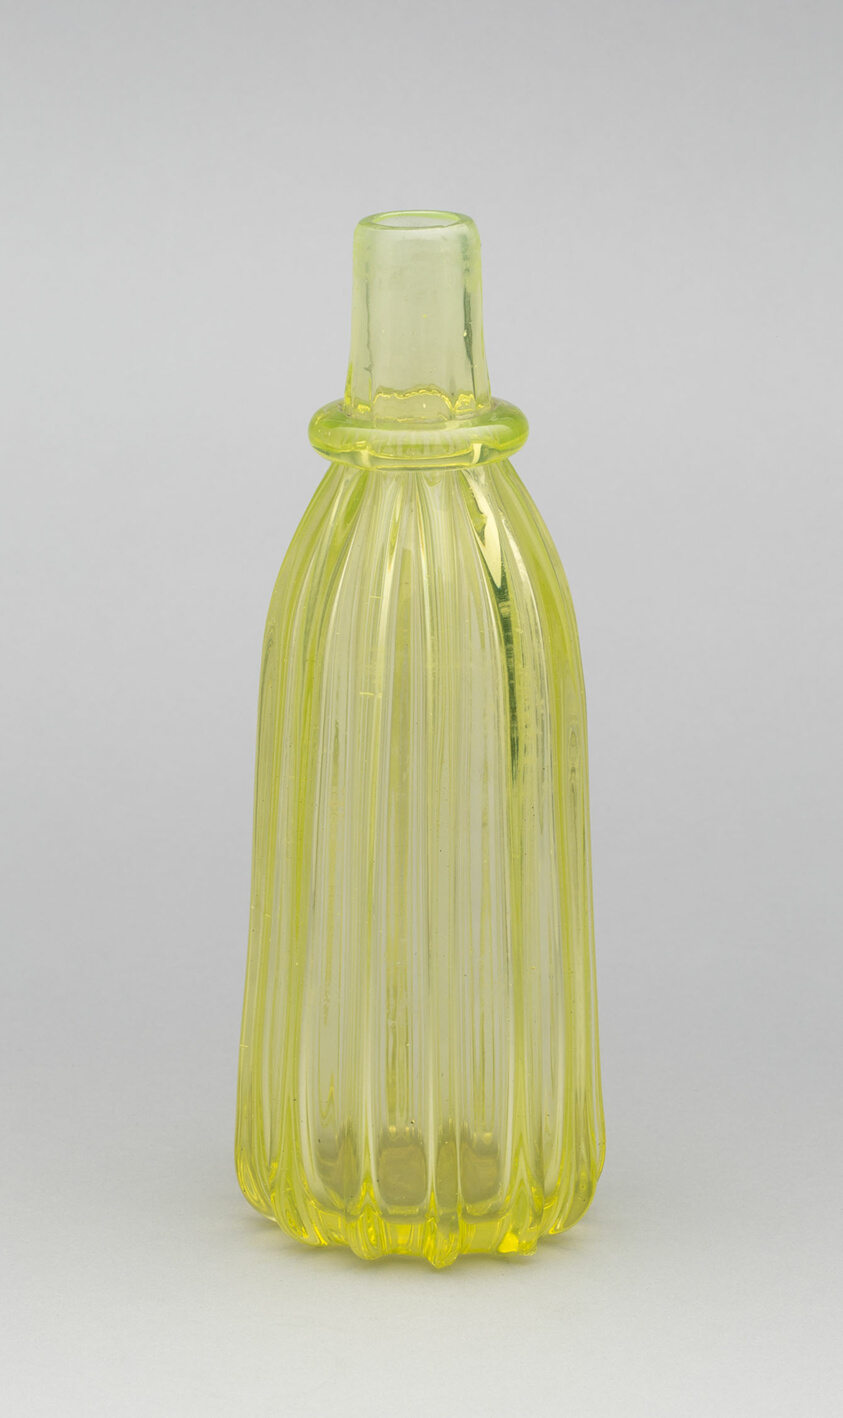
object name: Glass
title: Decanter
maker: Artist unknown (American, 19th century); Pittsburgh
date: 1835–65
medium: Glass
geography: Pittsburgh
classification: bottle; glass; american decorative arts; american arts; decorative arts